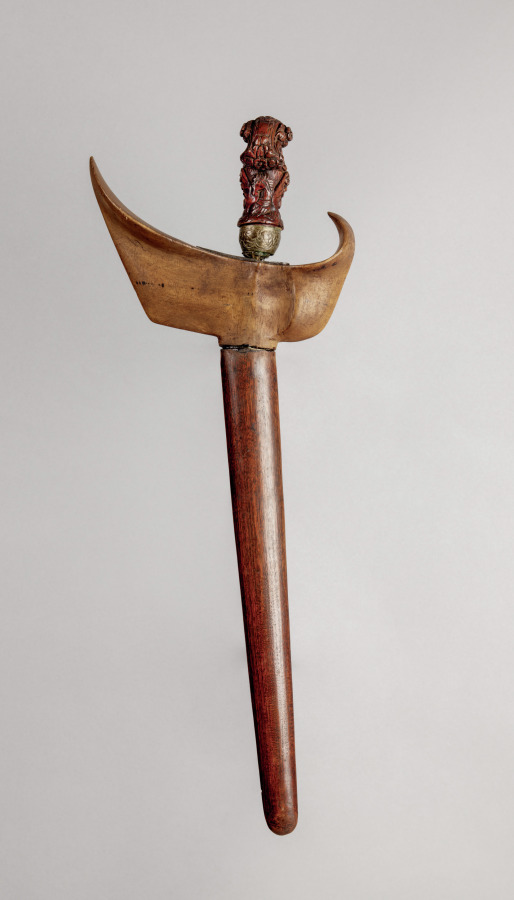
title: Sword (Kris)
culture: Java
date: 1800s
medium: iron with carved wooden handle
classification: Arms and Armor